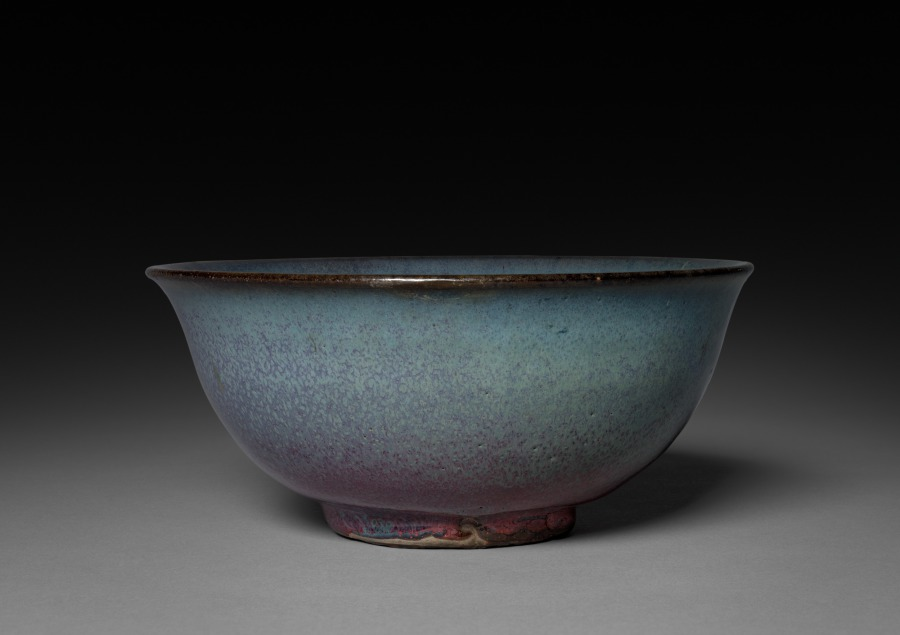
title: Bowl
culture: North China, Yuan dynasty (1271-1368) - Ming dynasty (1368-1644)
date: 1300s–1400s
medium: Glazed gray stoneware, Jun ware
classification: Ceramic